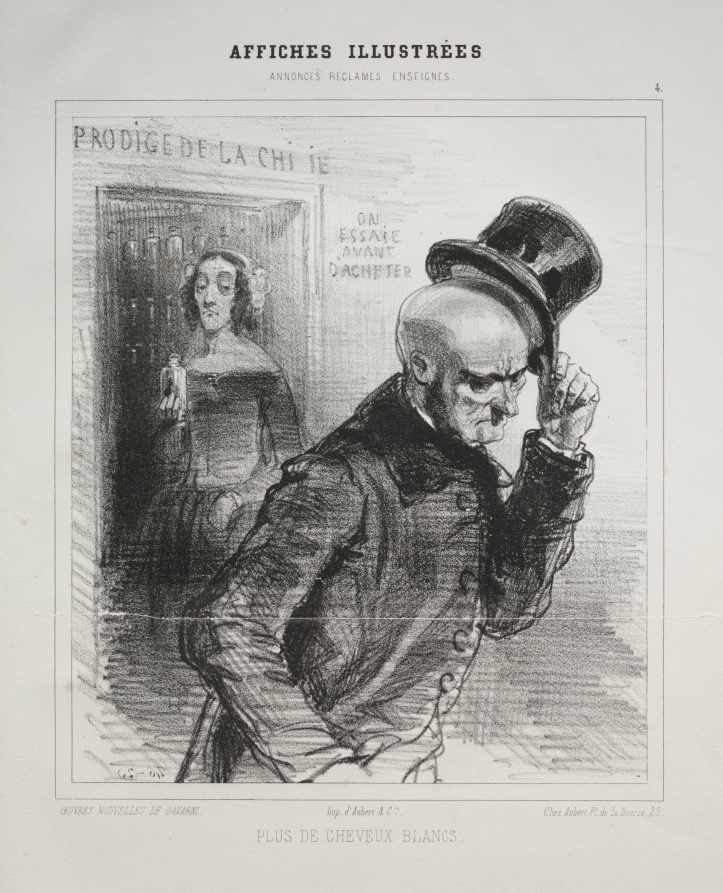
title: Affliches Illustrées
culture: France, 19th century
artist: Paul Gavarni (French, 1804–1866)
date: c. 1844–46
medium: lithograph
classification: Print